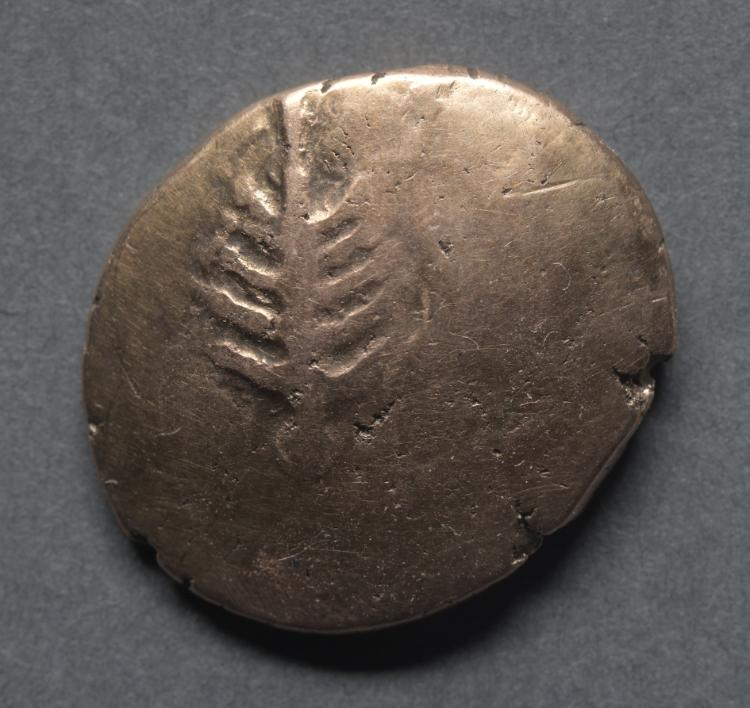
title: Catti Stater: Horse and Wheel (reverse)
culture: England, Dobunni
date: 20–45 CE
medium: gold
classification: Coins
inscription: [CATTI] (no more than the base of the last three letters are visible above the horse).